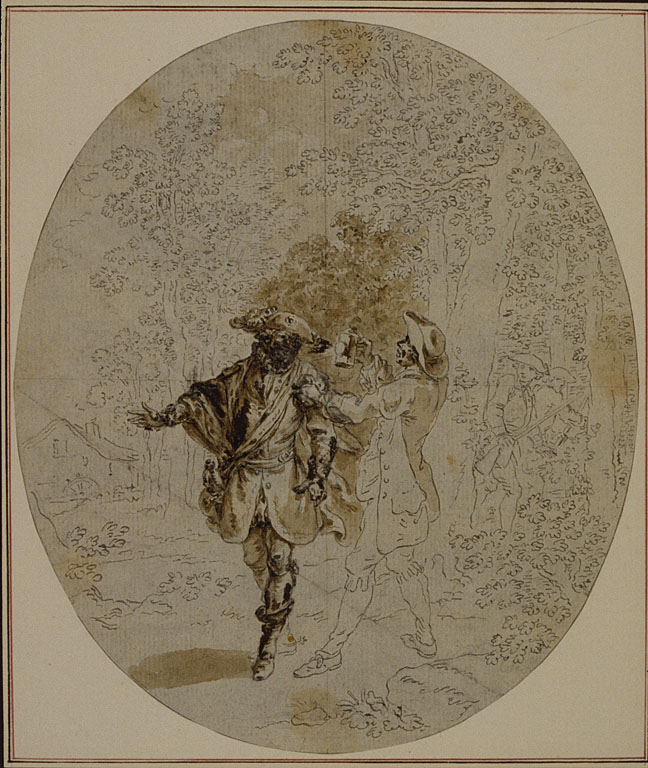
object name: Drawing and Watercolor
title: Study for a second edition, never published, of Colle's "La Partie de Chasse de Henri IV", Act II, Scene 11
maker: Hubert François Gravelot (French, 1699-1773)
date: before 1766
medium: Pen and black ink, with brush and brown wash, over touches of black chalk, on oval-shaped pale gray laid paper, incised for transfer and perimeter mounted on ivory laid paper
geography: France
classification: pen and ink drawings; drawings (visual works); prints and drawing